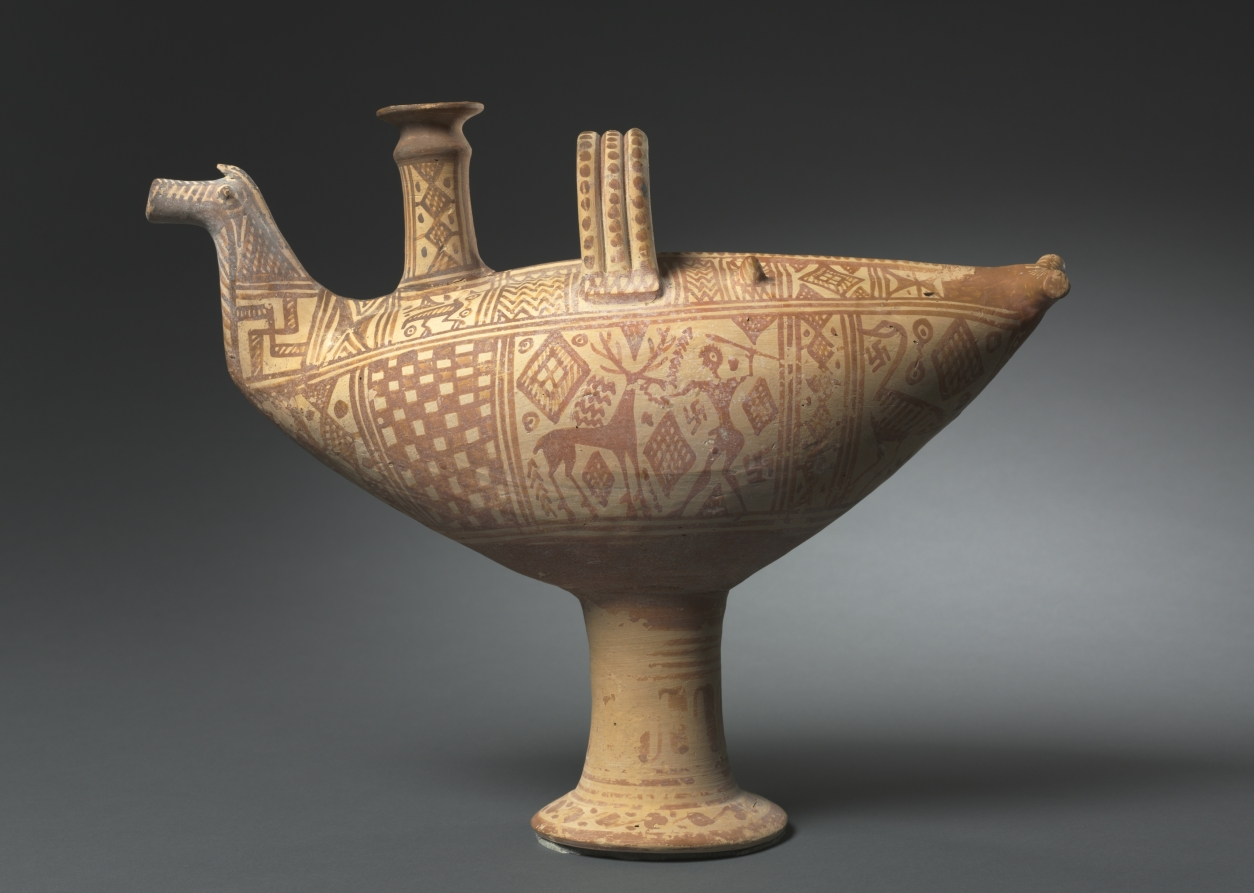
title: Italo-Geometric Bird Askos (Oil Vessel): Hunter (Herakles?) and Stag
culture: Etruscan, likely made at Vulci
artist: attributed to Bisenzio Class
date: c. 700 BCE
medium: ceramic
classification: Ceramic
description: This bird-shaped askos (oil vessel), with a tall filling spout and a pierced beak for pouring, perhaps held perfumed oil for a funerary function. Although the shape likely stems from Italian tradition, the abundantly painted geometric decoration, covering nearly every available surface, derives originally from Greece. Thus scholars have suggested that an immigrant Greek potter working in Etruria may have made the vessel. The sole narrative scene shows a man with a spear leading an antlered animal. If not an anonymous hunter, this could be the earliest known representation of the hero Herakles performing his third labor: capturing the golden-antlered Keryneian hind, or female deer.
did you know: This askos may feature the earliest known representation of Herakles's third labor, the Keryneian hind.